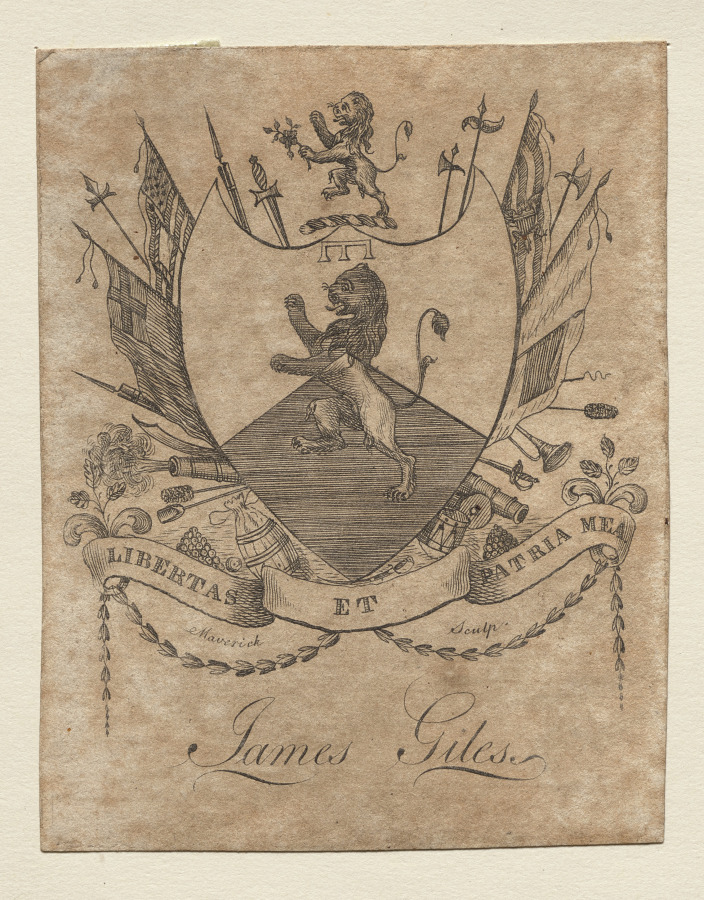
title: Bookplate: Coat of Arms with James Giles inscribed below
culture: America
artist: Peter Rushton Maverick (American, 1755–1811)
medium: engraving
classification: Print